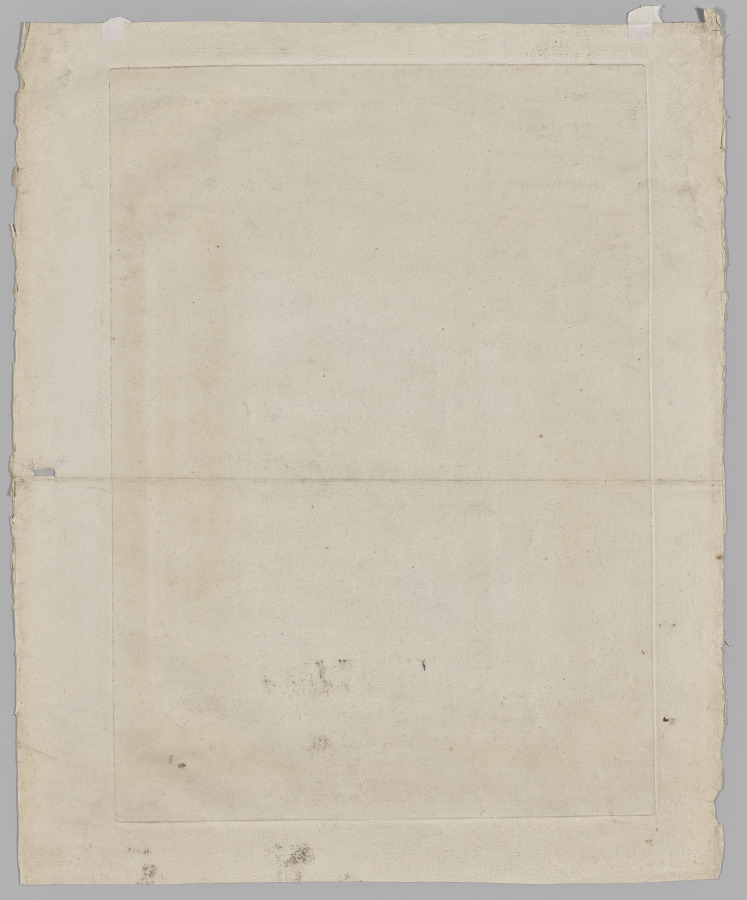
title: A View of the Vestibule of Saint Mary at Rome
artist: Georges Francois Blondel (French, 1730–1800)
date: 1766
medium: mezzotint printed in sepia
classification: Print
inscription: Imprinted on recto: “A View of the Vestibule of St. Mary at Rome”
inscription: Imprinted on recto: “G F Blondel Delin’t & Sculpt”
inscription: Imprinted on recto: “TO the Rt Hon’ble Mary Lady Hervy This Plate is most Humbly Dedicated by her Ladyships most humble Serv’t/Published according to Act/G F Blondel/Plate 4”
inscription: Watermark: Grand-Jésus stock of T. Dupuy, watermark Name of Jesus (IHS), countermark T Dupuy Fin Auvergne 1742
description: After returning from several years spent in Italy, the French printmaker George-Francois Blondel settled in London in order to take advantage of the English taste for images of Italian sites. This is one of a series of eight prints he published in 1766 depicting imagined and real Italian interiors. Using the relatively new technique of mezzotint, which creates velvety, dark tonal areas, as well as low vantage points, Blondel created towering, awe-inspiring spaces. For special patrons, he printed the plates in sepia ink, rather than in black; the CMA’s set includes two of these unusual sepia impressions.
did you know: Mezzotint was relatively new at the time this print was made and had yet to be utilized for such large plates of an architectural nature as seen here.